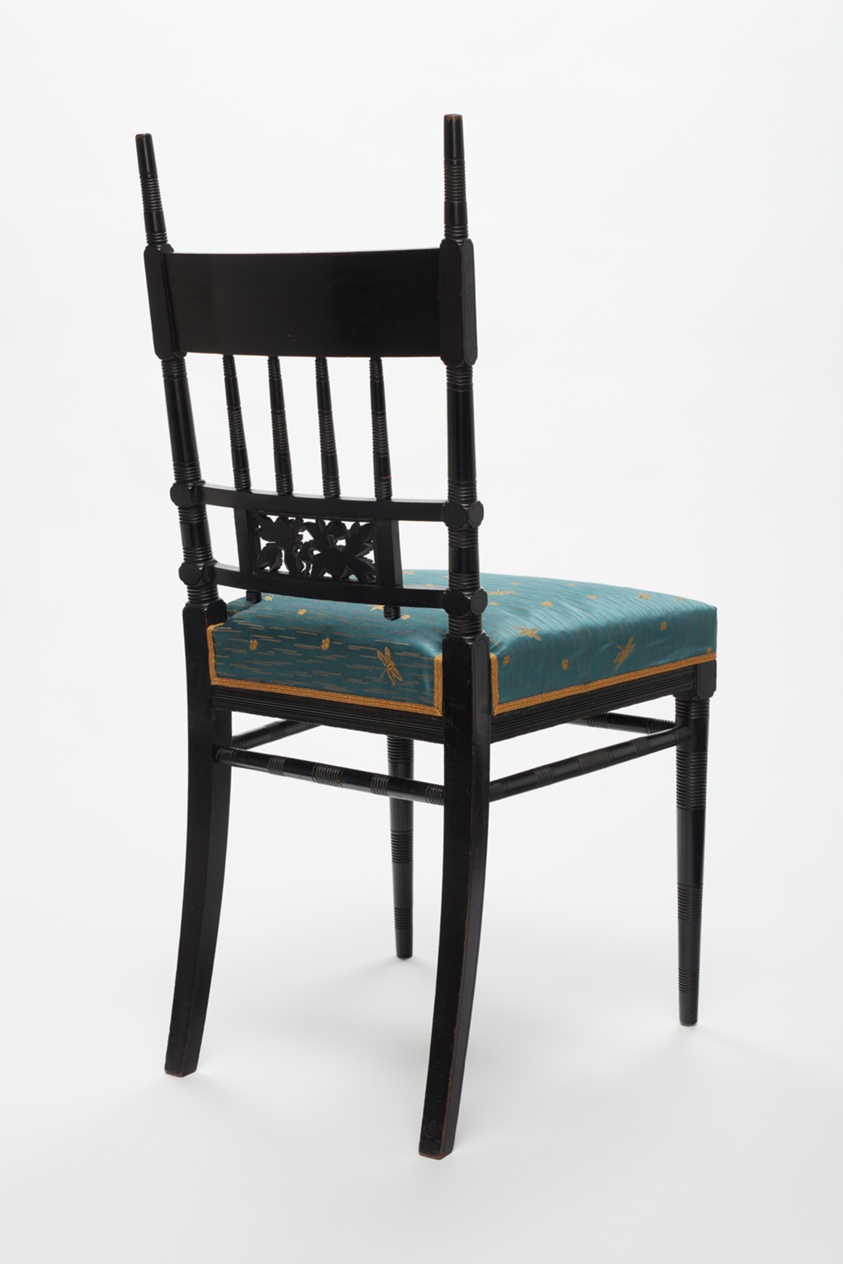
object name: Furniture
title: Side Chair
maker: Herter Brothers (American, 1864–1906); New York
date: 1877–85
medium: Ebonized cherry, various inlaid woods, and upholstery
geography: New York City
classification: seating; furniture; american decorative arts; american arts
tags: furniture